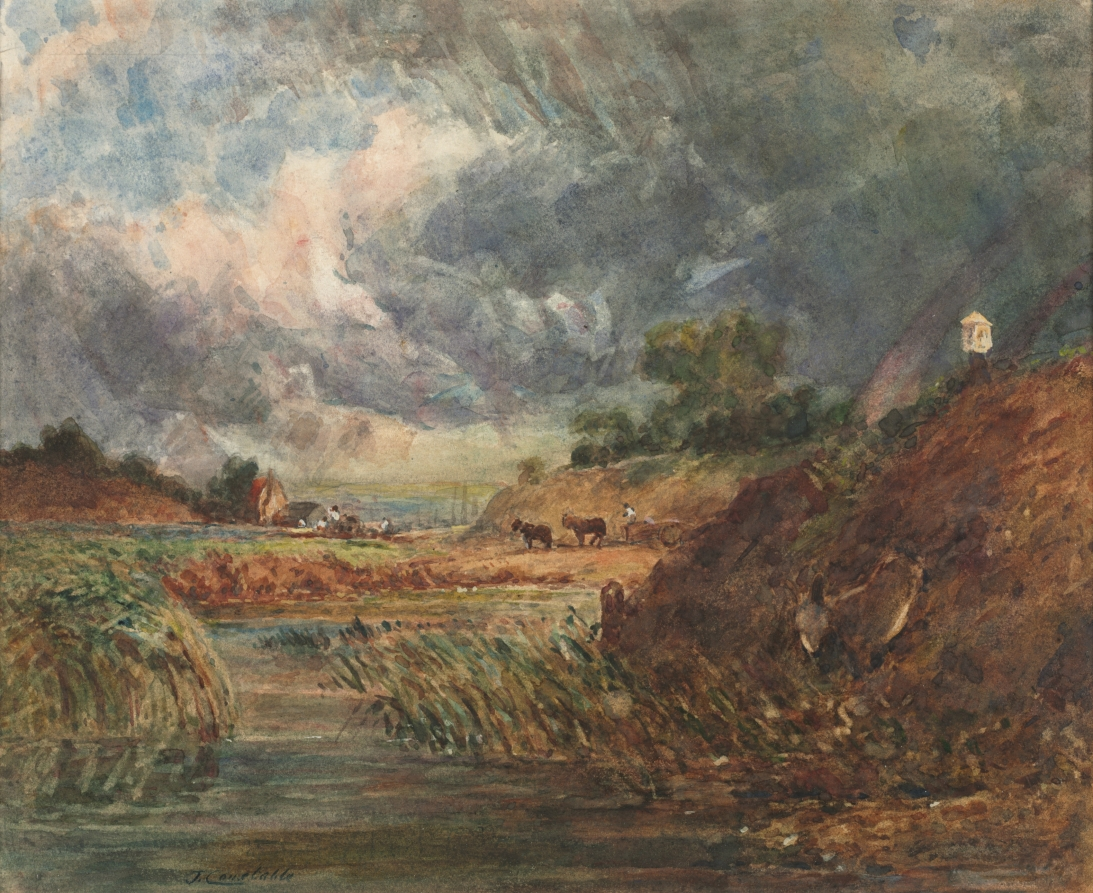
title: Hampstead Heath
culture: England, 19th century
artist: imitator of John Constable (British, 1776–1837)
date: 1800s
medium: watercolor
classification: Drawing